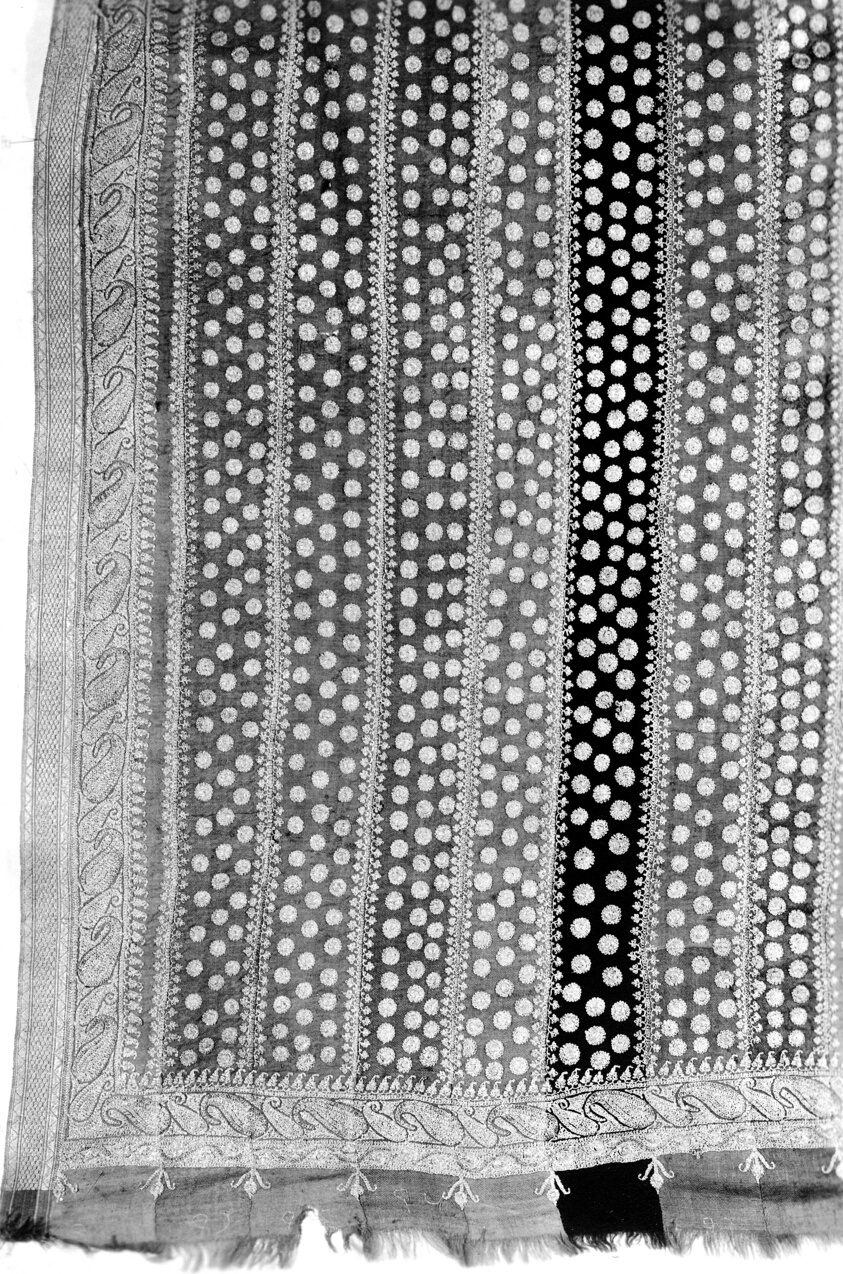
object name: Costume and Accessories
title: Shawl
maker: India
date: 19th century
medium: Wool, eighteen strips of plain simple twill; embroidered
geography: India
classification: textile; costume; dress (garment); clothing